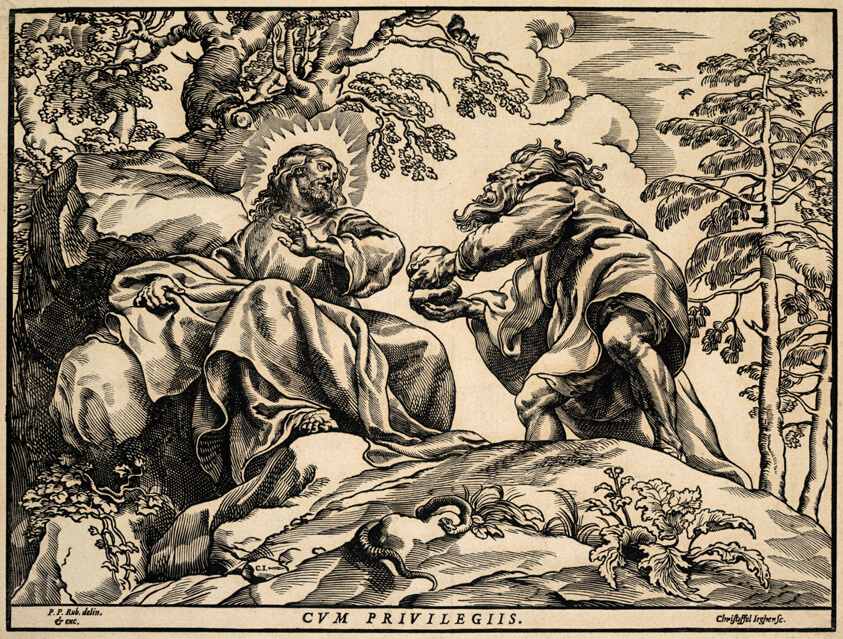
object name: Print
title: The Temptation of Christ by the Devil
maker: Christoffel Jegher (Flemish, 1596-1652/53); after Peter Paul Rubens (Flemish, 1577-1640)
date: 1633/35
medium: Woodcut in black on cream laid paper, tipped onto ivory laid paper mount prepared with ochre wash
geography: Flanders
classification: woodcut; print; prints and drawing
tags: Jesus, Christian subjects, mythology, prints and drawings, devil/satan/lucifer/beezelbub/mephistopheles, temptations